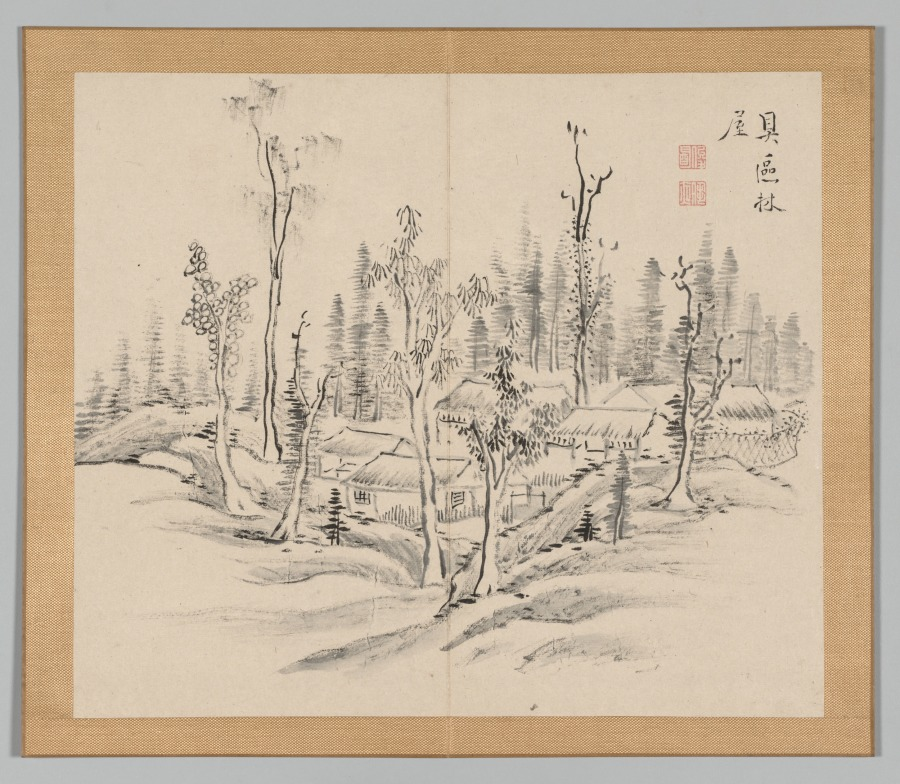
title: Reverberations of Taiga, Volume 2 (leaf 23)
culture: Japan, Edo period (1615–1868)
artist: Aoki Shukuya (Japanese, d. 1802)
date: mid- to late 1700s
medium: double-leaf from a pair of albums; ink and light color on paper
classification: Portfolio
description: Traditionally, young painters in Japan began their studies with an established master-painter. The master's compositions invariably became models that the apprentice copied to learn various ink and brush techniques. Shukuya was a pupil of the famous Kyoto artist Ikeno Taiga, whose style is reflected in these sketches of rocks, trees, and mountains.